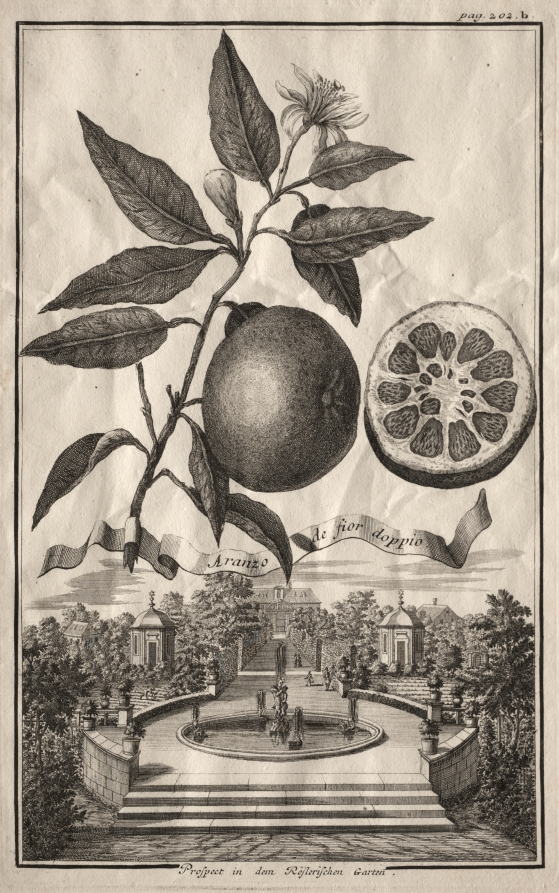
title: Nurnbergische Hesperides: Aranzo de fior doppio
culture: Hungary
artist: Joseph de Montalegre (Hungarian)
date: 1714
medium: etching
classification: Print